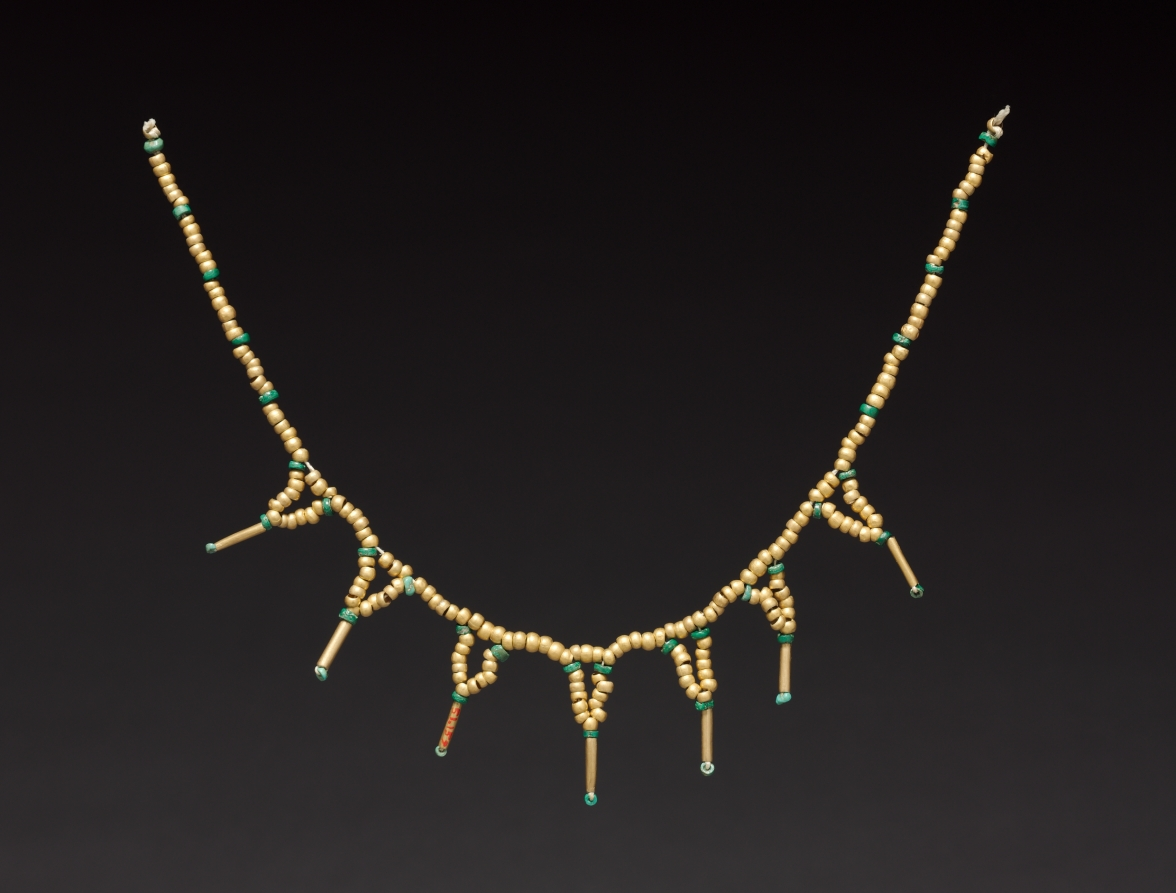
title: Beads Strung as a Necklace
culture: Central Panama, (Sitio Conte?), Conte Style, 5th century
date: c. 400–500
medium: gold and turquoise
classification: Jewelry